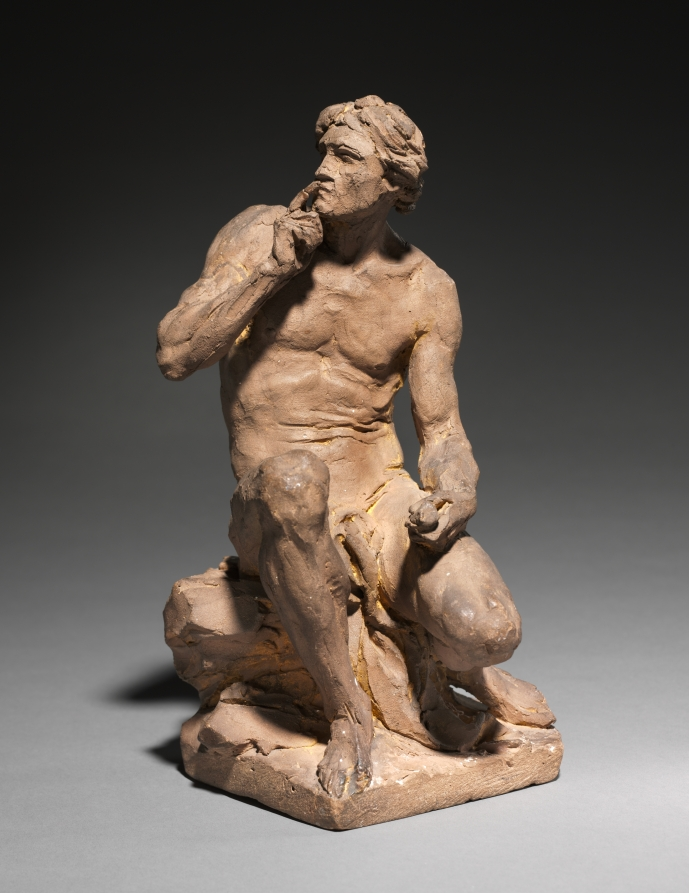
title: Study for "Silence"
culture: France, 18th century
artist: attributed to Louis-Philippe Mouchy (French, 1734–1801)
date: c. 1780–89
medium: terracotta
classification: Sculpture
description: When originally acquired this work was understood as a sketch for the "Citizen," a figure for a monument to King Louis XV in the French city of Rheims by Jean-Baptiste Pigalle. In that work the figure of the "Citizen" appears at the base, opposite an allegory of law, underneath a sculpture of Louis XV. The attribution was changed, however, after research made evident that the museum's sculpture precisely matches the iconography for "Silence." Moreover, the figure differs considerably from Pigalle's final figure of the "Citizen," throwing the attribution to Pigalle in question as well. The work is now believed to be by Pigalle's close follower, Mouchy, because of its similarity to a sculpture completed in 1789 for Madame Pompadour called Silence, which currently resides in the Luxembourg Palace in Paris.